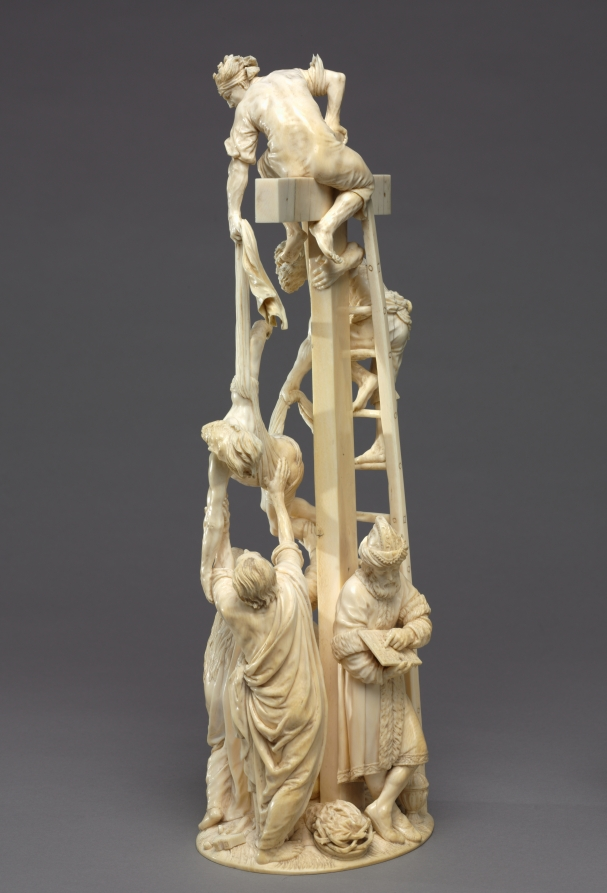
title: Descent from the Cross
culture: Austria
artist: Adam Lenckhardt (German, 1610–1661)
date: 1653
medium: ivory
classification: Sculpture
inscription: inscribed with monogram "AL" conjoined and dated 1653.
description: Carved from a single piece of ivory for Prince Karl Eusebius von Liechtenstein of Vienna, this work is a true tour-de-force. It took Lenckhardt seven years to complete; it is his last known sculpture and the pinnacle of his career. The biblical accounts of the descent from the cross found in the gospels are not consistent, which may contribute to the difficulty in precisely identifying the figures. The Virgin Mary, Saint John, Mary Magdalene, and others were said to be present, but undoubtedly there are other disciples here mourning Christ’s death. The intense emotion registers on the faces of the figures in the scrupulous and exquisitely detailed work.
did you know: Carved from a single elephant tusk, the artist took special care to ensure the ivory did not crack or break as he meticulously crafted each figure in this visually exciting sculpture. Look closely to find tools and small objects included near its base.